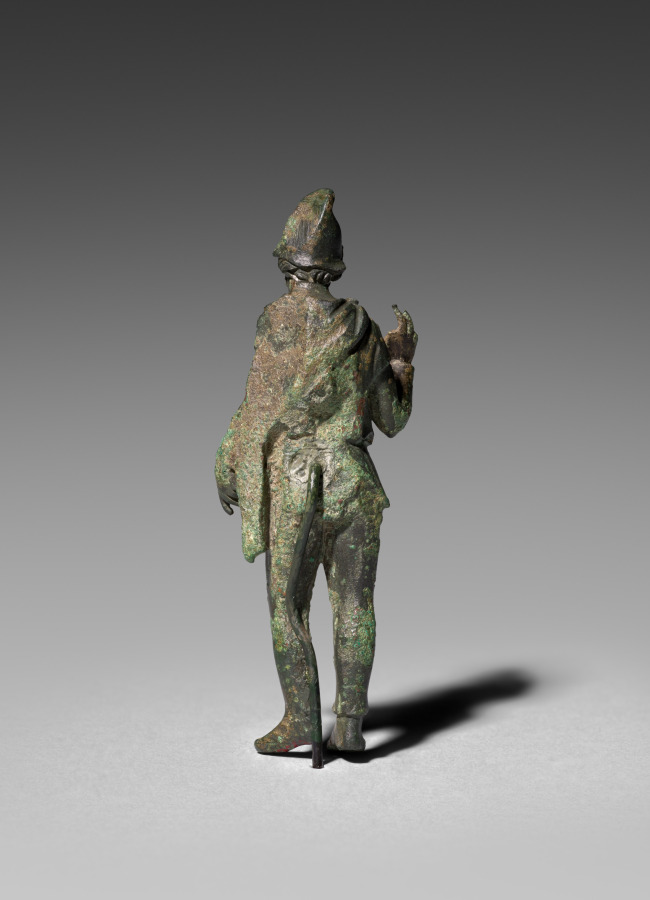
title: Barbarian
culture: Italy, Rome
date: 1–100 CE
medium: bronze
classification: Sculpture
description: This bearded figure wears a tunic, trousers, and a soft conical hat with the apex bent over, called a Phrygian cap. He stands with his right hand raised (missing the index and little finger) and his left leg slightly bent. The figure originally held an implement in his lowered left hand, whose fingers curve around a shaft. The garments and cap identify him as a foreigner, likely a Dacian. Emperor Trajan (reigned AD 98–117) fought two military campaigns against Dacia (modern-day Romania), where he conquered and annexed the southern half of the region.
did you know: This figure may have decorated an ornate parade breastplate on a horse.